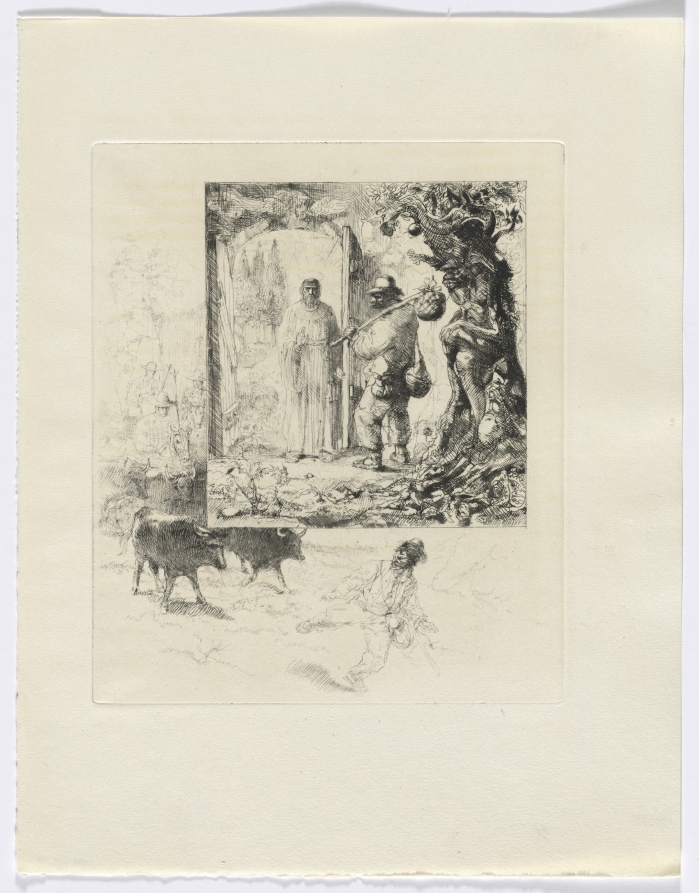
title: Frédéric Mistral: Mémoires et Recits by Frédéric Mistral: vagabond and monk/ landscape with cows (insert after 160)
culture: France, 20th century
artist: Auguste Brouet (French, 1872–1941)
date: 1937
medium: etchings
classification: Portfolio